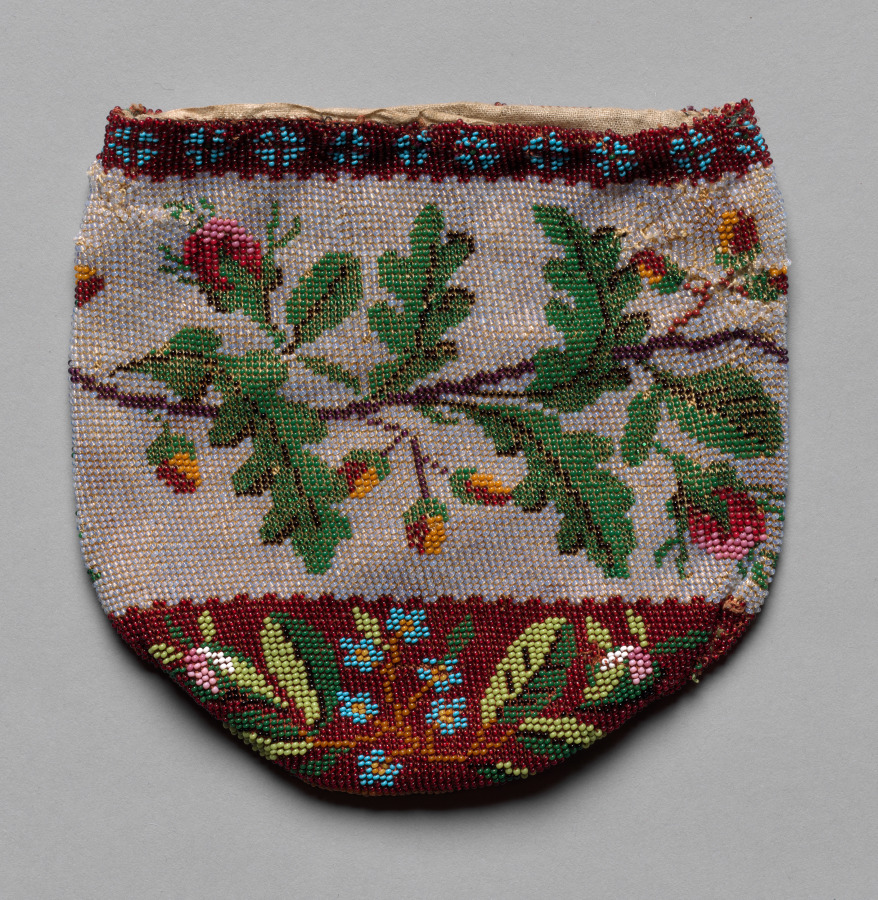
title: Beaded Bag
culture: America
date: 19th century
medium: glass beads, cotton? lining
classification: Garment